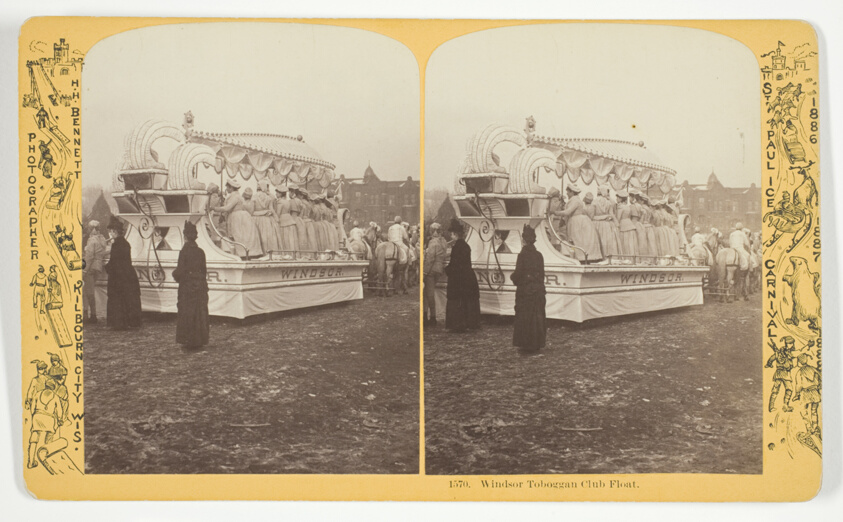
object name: Photograph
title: Windsor Toboggan Club Float, No. 1570 from the series "St. Paul Ice Carnival"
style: 19th century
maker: Henry Hamilton Bennett (American, born Canada, 1843-1908)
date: 1886/88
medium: Albumen print, stereo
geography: Wisconsin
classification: photography; photograph; albumen silver print; stereograph (albumen)